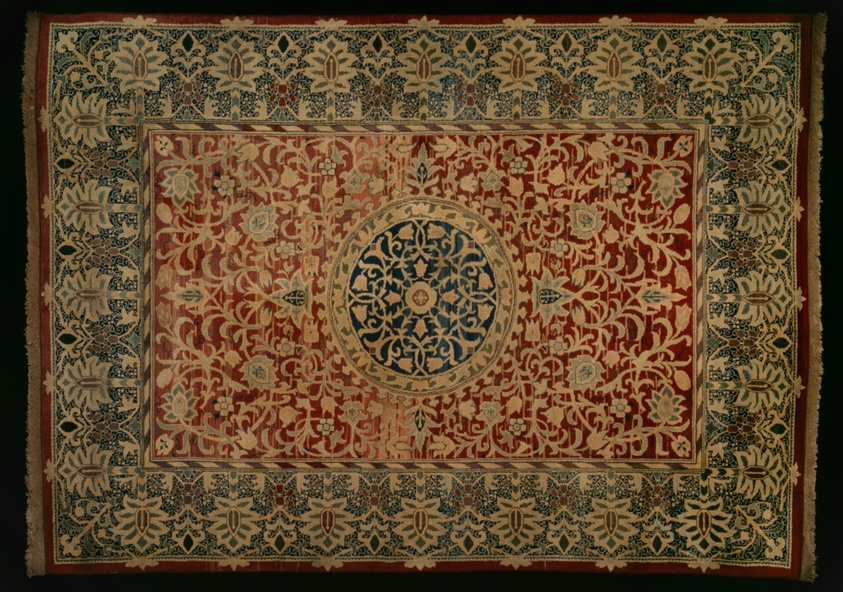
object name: Textile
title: "Swan House" Carpet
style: Arts and Crafts Movement, british, 19th century, British Arts and Crafts Movement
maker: Designed by William Morris (English, 1834–1896); Produced by Morris & Co., London (English, 1875–1940); Merton Abbey, London (English, 1881–1940)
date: Design c. 1883, made 1887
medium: Cotton and wool, plain weave with supplementary wrapping wefts forming "Ghiordes knots" cut pile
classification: textile; weaving - carpet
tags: Chicago, floral